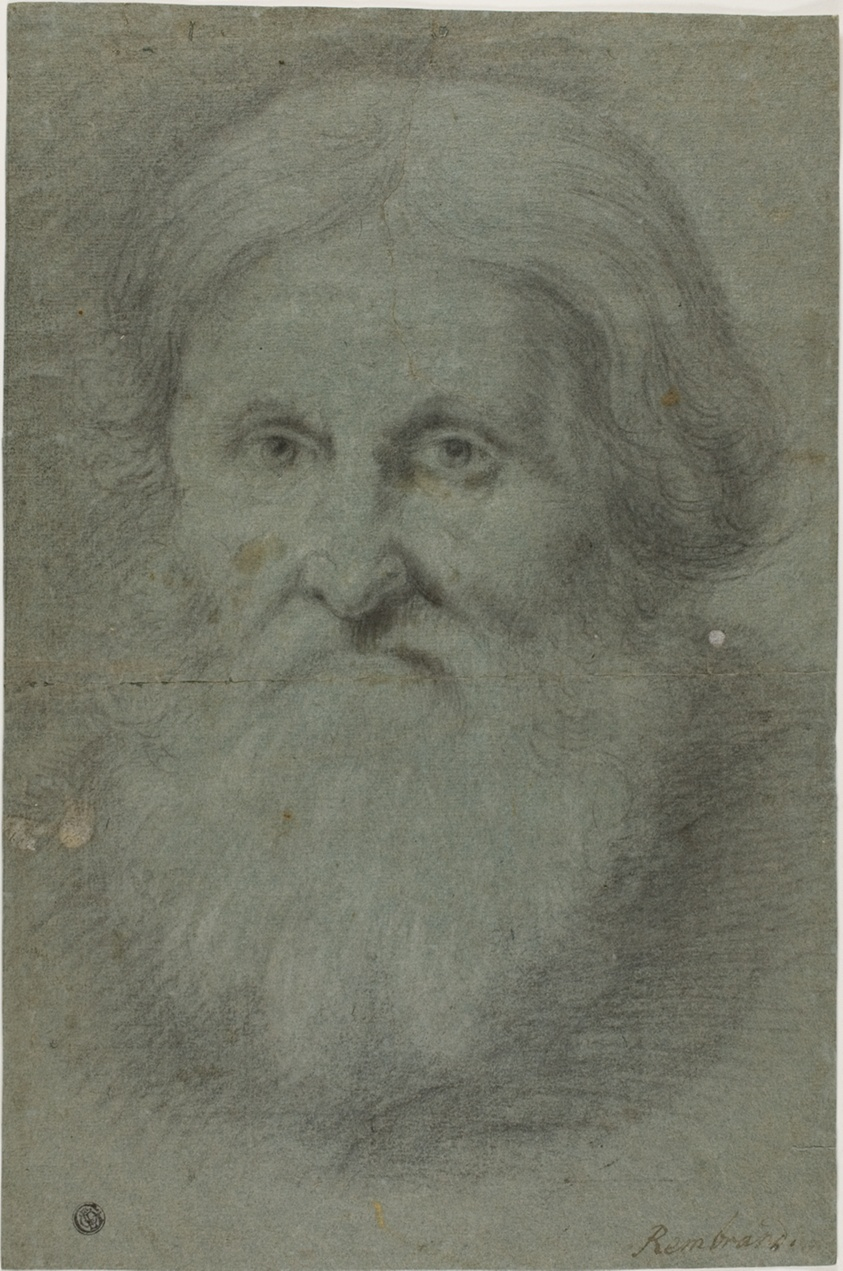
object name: Drawing and Watercolor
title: Final Published Work: Head of Menem Ben Israel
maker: After Rembrandt van Rijn; Dutch, 1606-1669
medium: Charcoal, with stumping, heightened with traces of white chalk, on blue laid paper, laid down on cream laid paper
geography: Holland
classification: charcoal; drawings (visual works); prints and drawing